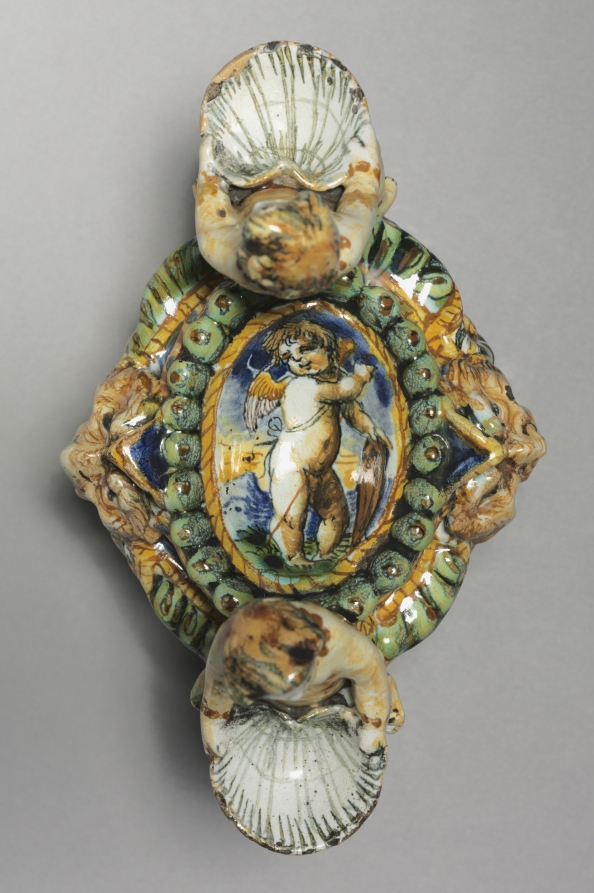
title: Saltcellar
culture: Italy, Urbino, 16th century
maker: circle of the Patanazzi Family (Italian)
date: c. 1570–90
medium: tin-glazed earthenware (maiolica)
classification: Ceramic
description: During the Italian Renaissance of the 1400s and 1500s, nobles and merchants eager to express their wealth and sophistication ordered ceramics for dining, display, and storage. Known as maiolica, because it resembled the brightly colored ceramics from the Mediterranean island of Majorca, these ceramic vessels were covered with a tin glaze that provided an opaque white surface on which colorful decoration could be painted.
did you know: During the Renaissance, salt was an expensive commodity and was used to both season and preserve food.